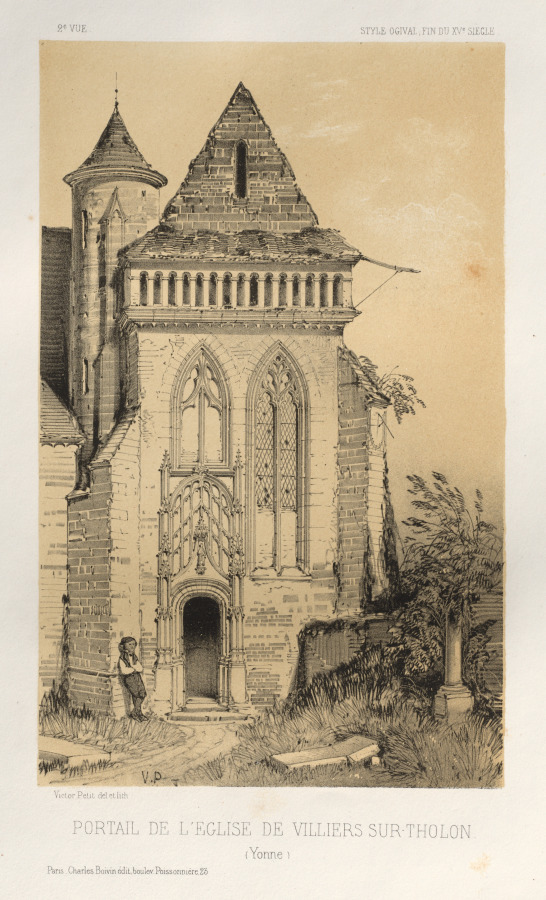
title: Architecture Pittoresque ou Monuments des xveme. Et xvieme. Siecles: Chateaux De France des XV et XVI Siecles: Pl.2, Portail de L'Eglise de Villiers Sur-Tholon (Yonne)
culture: France, 19th century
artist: Victor Petit (French, 1817–1874)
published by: Charles Boivin (publisher and editor); Lith de Godard a Paris (printer)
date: 1860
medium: lithograph with tint stone, from portfolio of 100 lithographs with tint stone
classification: Print